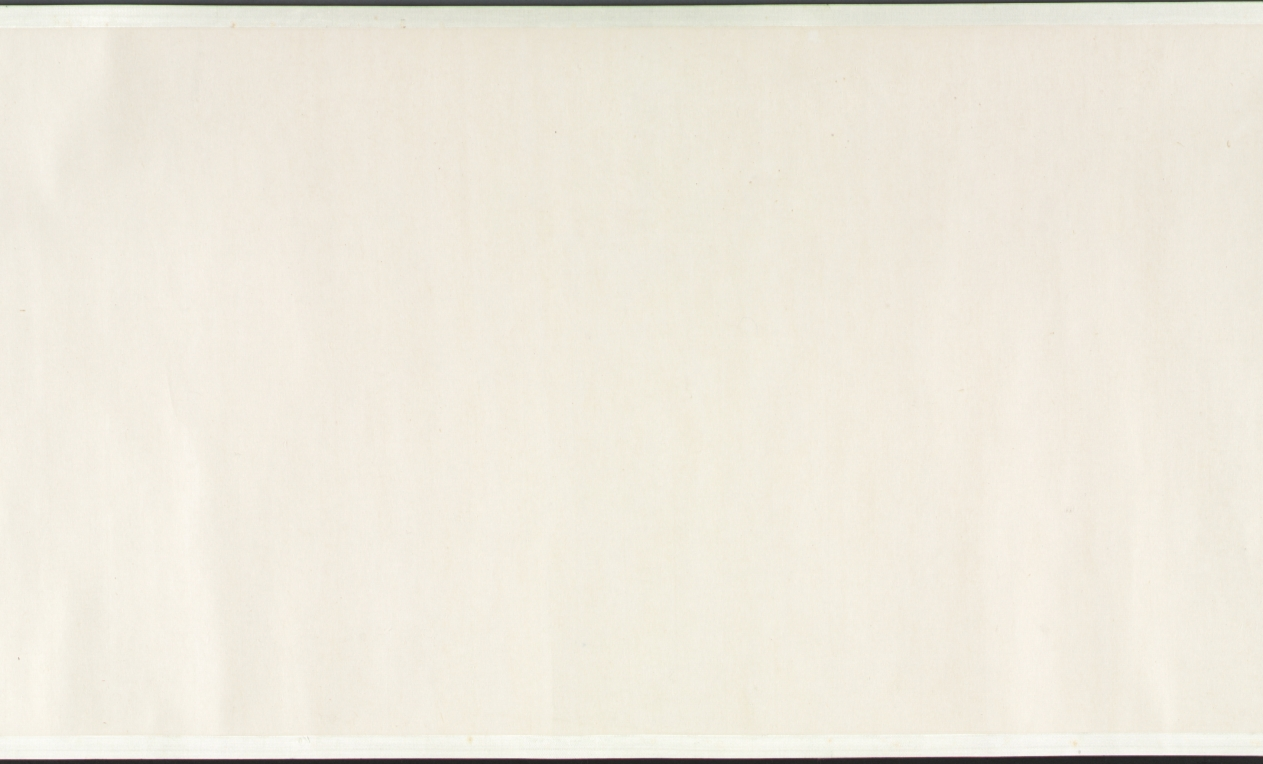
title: Buddha's Conversion of Five Bhiksu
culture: China, Yuan dynasty (1271–1368)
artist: Li Sheng (Chinese, active c. 1324–after 1375)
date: mid-1300s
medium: handscroll; ink on paper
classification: Painting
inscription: 紫篔生李升識 [印] 李氏子雲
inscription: 4 colophons and 12 additional seals: The "Heart" Sutra (Maha Prajnaparamita) text written by Wu Yuqing 吳餘慶 (active early 1400s); 2 seals of Xu Qianxue 徐乾學 (1631–1694); 3 colophons, one dated 1929 and two dated 1936, and 9 seals of Wu Hufan 吳湖帆 (1894–1968); 1 colophon, dated 1932, of Chen Dingshan; 1 seal unidentified.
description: This episode stems from the life of the historical Buddha, who, after his enlightenment, was initially hesitant about preaching his own doctrine. After much personal deliberation and prodding by deities, he finally relented. The first converts were the five guards who served him when he was still a prince. For Li Sheng, this is the pretext of the painting, which moves from the interaction of the bhiksu with the Buddha to a broader awareness of the vast surroundings of the scene.